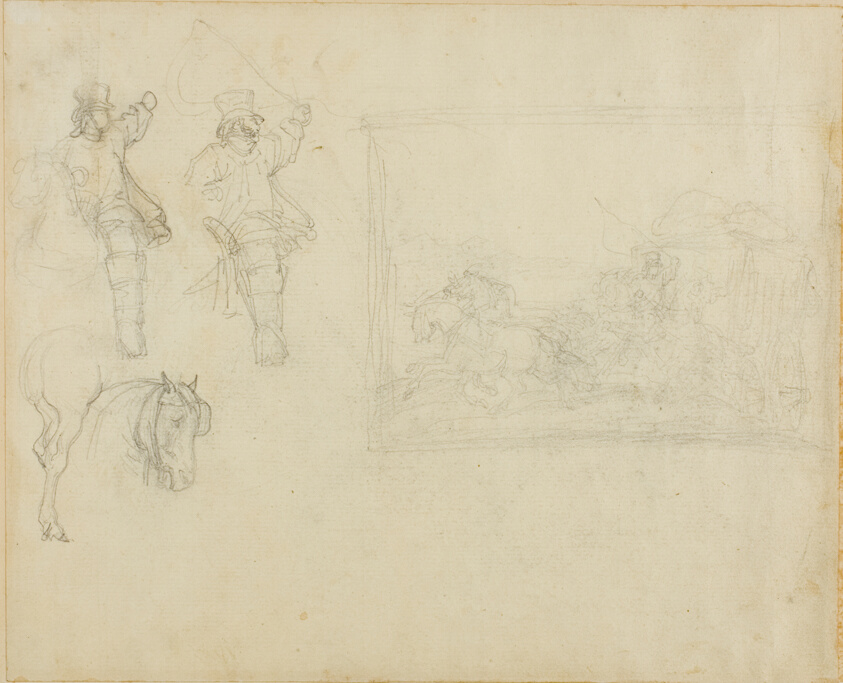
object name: Drawing and Watercolor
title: Sketches of Postillions and a Stagecoach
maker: Jean Louis André Théodore Géricault (French, 1791-1824)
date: 1818/19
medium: Graphite on cream laid paper, perimeter mounted on cream wove paper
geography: France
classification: drawings (visual works); prints and drawing